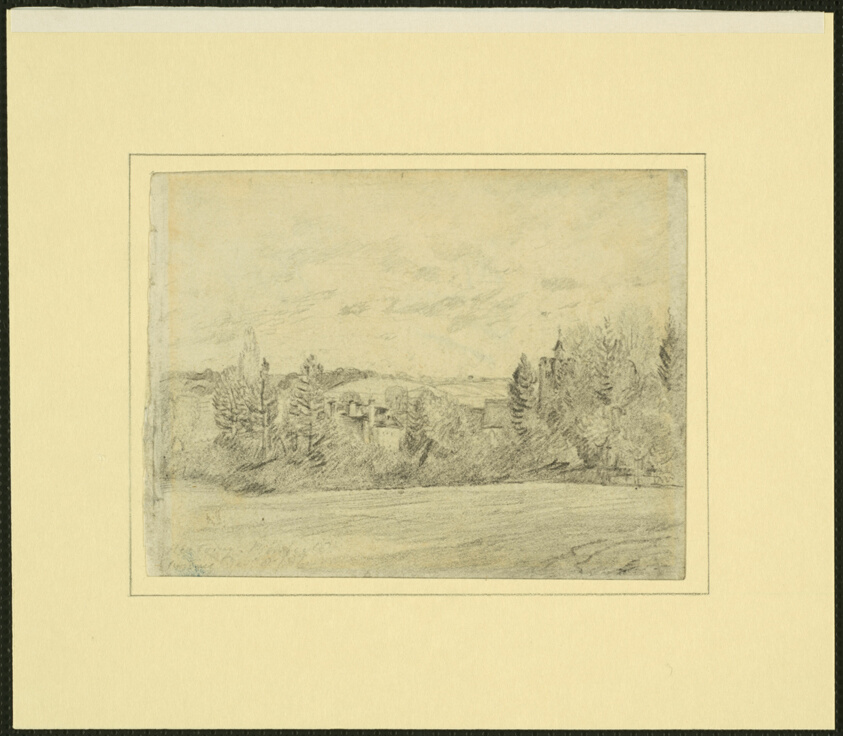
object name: Drawing and Watercolor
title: Binfield Rectory and Church, Berkshire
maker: John Constable (English, 1776-1837)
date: 1816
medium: Graphite on ivory wove paper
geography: England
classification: graphite; drawings (visual works); prints and drawing